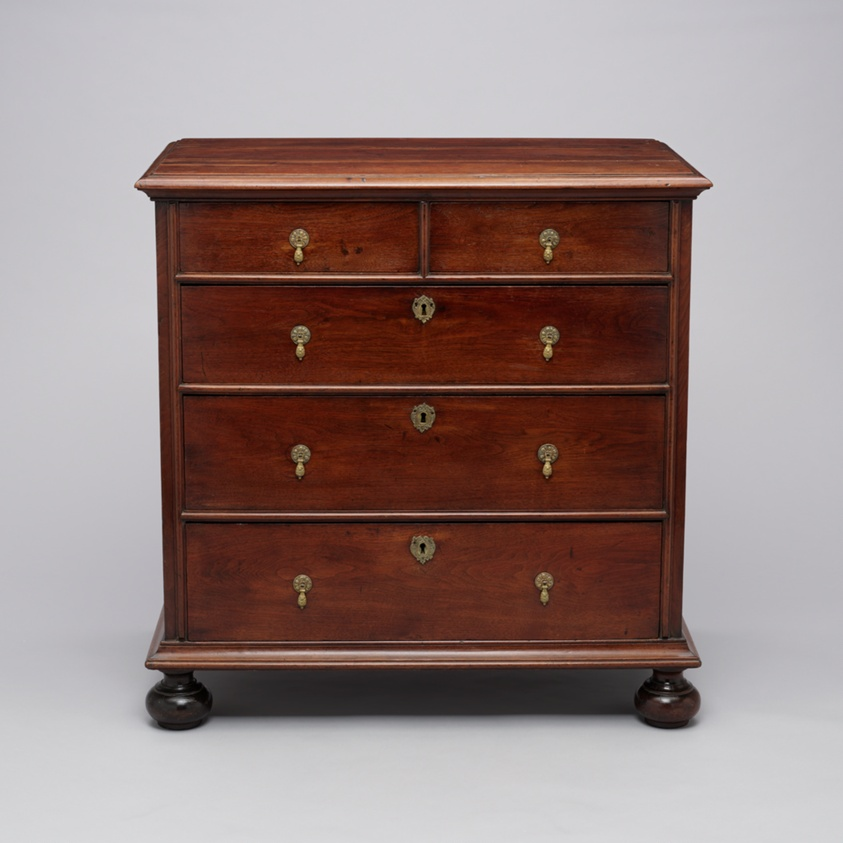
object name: Furniture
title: Chest of Drawers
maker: Artist unknown (American, 18th century); Pennsylvania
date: 1700–30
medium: Walnut, tulipwood, and pine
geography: Pennsylvania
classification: case furniture; furniture; american decorative arts; american arts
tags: furniture